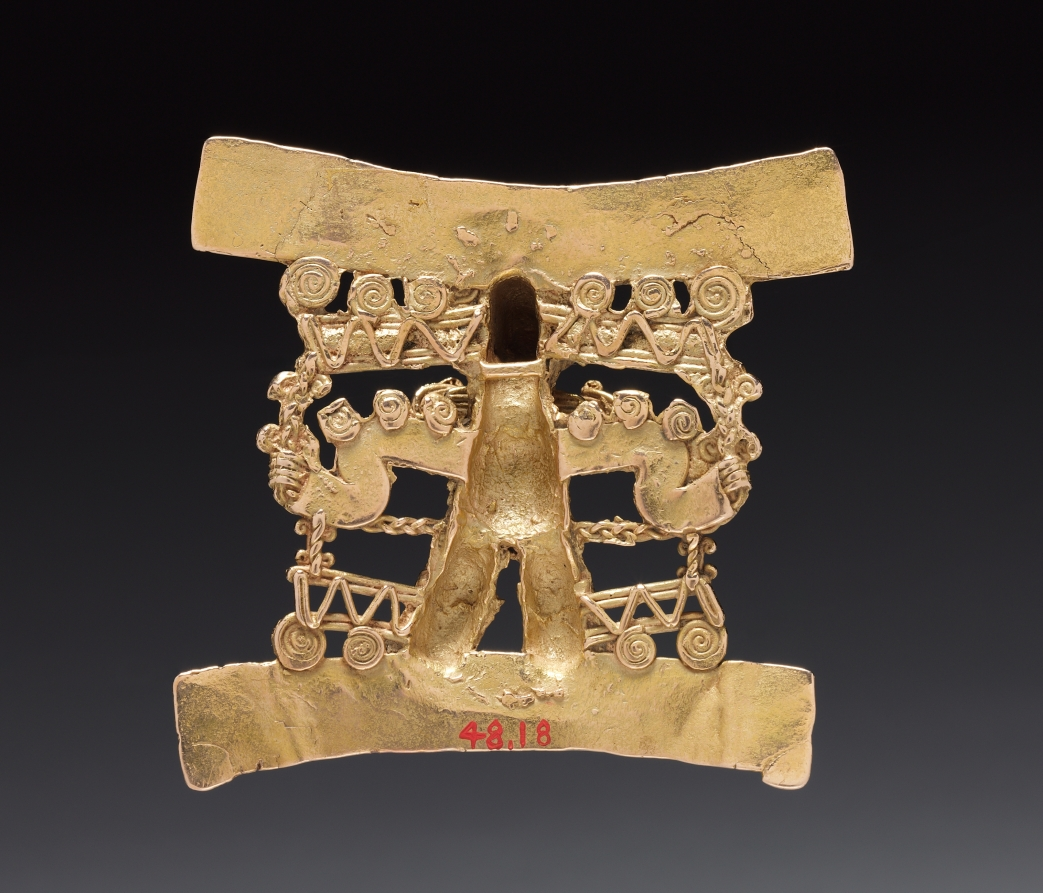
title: Animal-Headed Figure Pendant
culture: Costa Rica, Diquís region, 11th-16th century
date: c. 1000–1550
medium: cast gold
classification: Metalwork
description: Among the pendants shown here are a crustacean (1943.290), an animal-headed figure (1948.18), and two pendants featuring birds (1951.442 and 1946.223). The latter were dubbed aguilas (eagles) by Christopher Columbus, who saw natives wearing them as necklace ornaments. Modern researchers are not as sure of the species shown, but some believe that they are birds of prey because talons and beaks are prominent and often clutch something, in one example here a small, disembodied head that holds a clapper. In both examples, two tufts in the form of crocodiles in profile flank the birds’ heads.